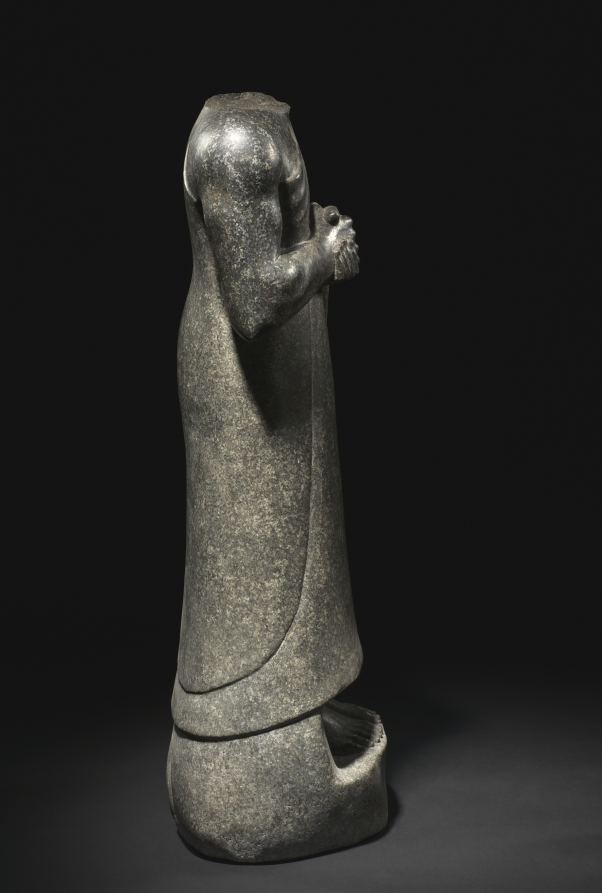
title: Statue of Gudea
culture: Mesopotamia, Neo-Sumerian, Iraq, Girsu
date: c. 2144–2124 BCE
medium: dolerite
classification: Sculpture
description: This headless figure’s clasped hands create a distinctive gesture that recurs frequently on more than 30 recorded statues of the Mesopotamian ruler Gudea. Between c. 2144–2124 BCE, Gudea ruled as ensi (governor) of the city-state of Lagash, located in modern-day Iraq. Scholars have identified more than 2,400 inscriptions that describe his reign, which included patronage of the arts and an extensive building program. Statues like this one would have been placed in temples as stand-ins for Gudea himself, demonstrating his devotion and piety.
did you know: Twice in the 20th century, this headless figure was wrongly "completed" with the head 1963.680, which comes from a similar sculpture.